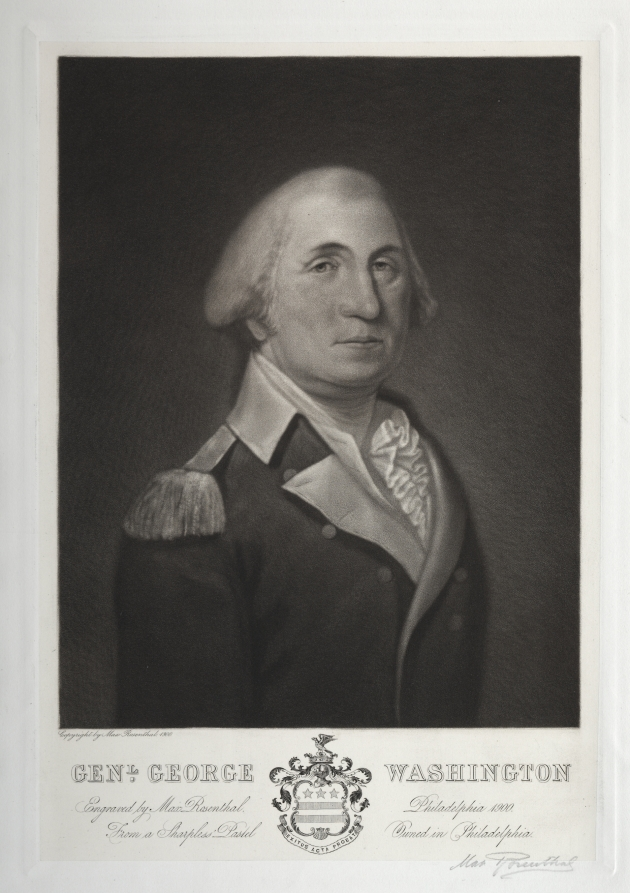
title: George Washington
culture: America, early 20th Century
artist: Max Rosenthal (American, 1833–1918)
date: 1900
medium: mezzotint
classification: Print